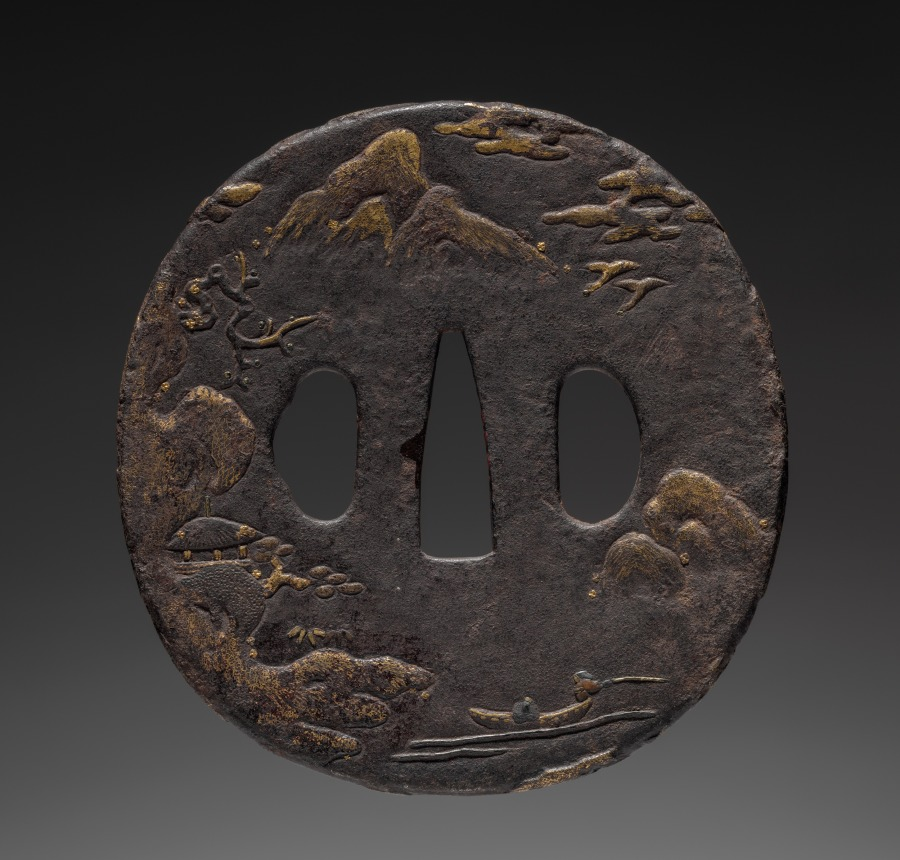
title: Sword Guard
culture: Japan, Edo period (1615–1868)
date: late 1700s-early 1800s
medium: iron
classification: Arms and Armor